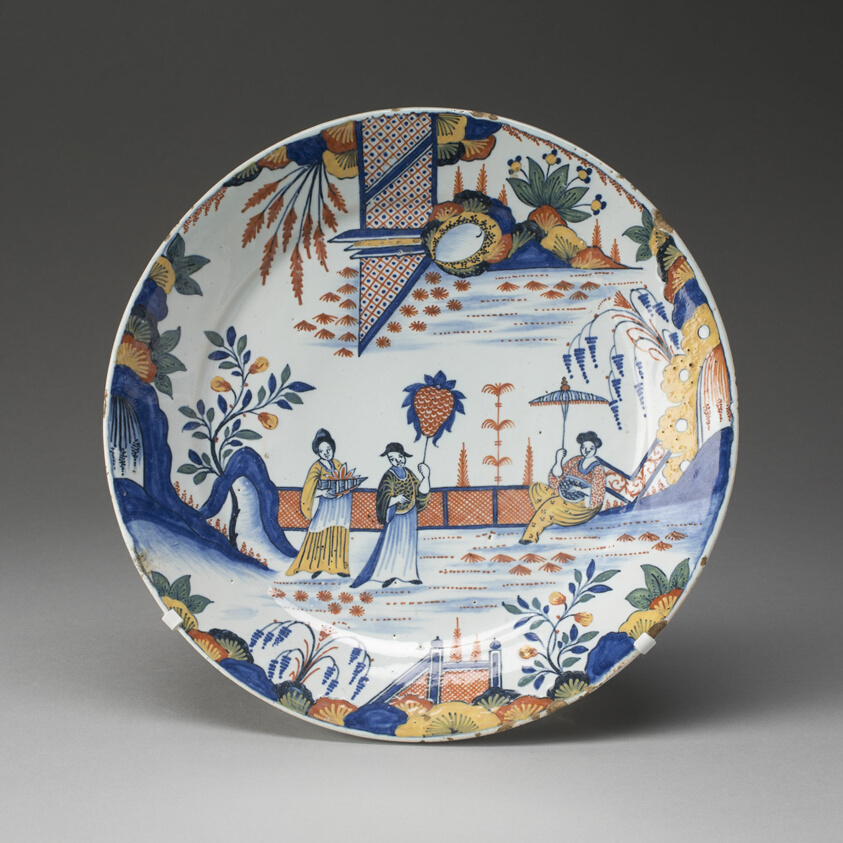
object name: Ceramics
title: Plate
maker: Delft, Netherlands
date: c. 1750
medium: Tin-glazed earthenware (Delftware)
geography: Delft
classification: plate (general, dish); dish (vessel); earthenware; ceramics; european decorative arts; tin-glazed ware